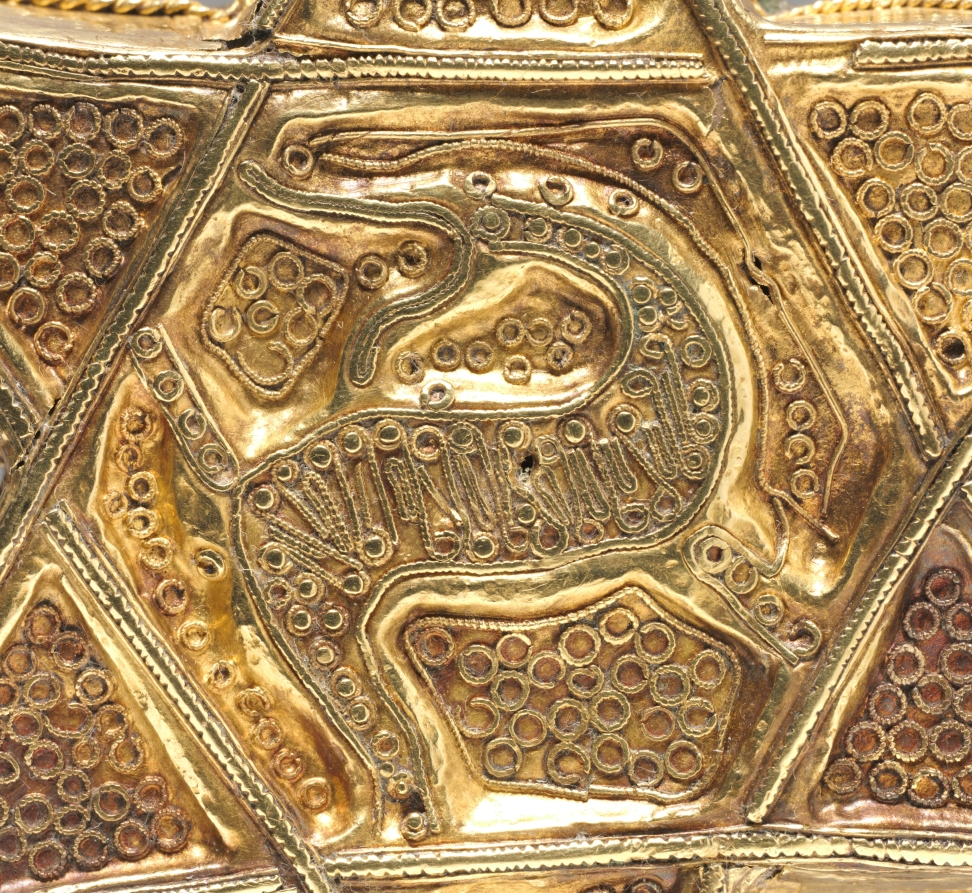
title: Brooch in the Form of a Six-Pointed Star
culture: Frankish, early Carolingian, late 8th century - early 9th century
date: late 700s-early 800s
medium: gold with repoussé and filigree decoration; copper backplate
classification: Metalwork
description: Women used brooches like this to fasten their veils beneath the chin. Its rare form--a hexagram--suggests that it also functioned as a talisman or amulet to attract good luck and to ward off evil.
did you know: Look carefully at this brooch and notice a small animal, perhaps a dragon, camouflaged amid the swirling whirls of gold.